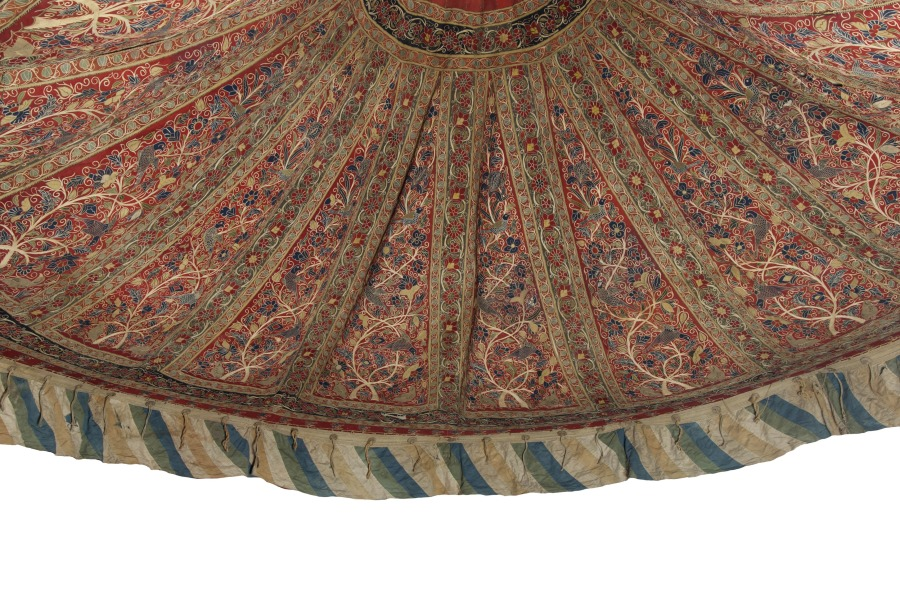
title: Royal Round Tent made for Muhammad Shah (Roof)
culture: Iran, Rasht, Qajar period (1779-1925)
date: 1834–48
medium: Interior: wool: plain weave, inlaid work; silk: embroidery, chain stitch; tape, leather; Exterior: cotton, wool: plain weave; rope, iron ring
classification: Textile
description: Royal tents were potent symbols of authority, wealth, and power throughout the greater Middle East. Rulers owned thousands of tents. They were used for shelter, shade, and innumerable functions in tent compounds that were essential for imperial ceremonies, travel, and military campaigns. Distinguished by size with elaborately decorated interior walls and ceilings, tents could be as large as castles. Opulent tents were also presented as imperial gifts. Tents are only known through documents before 1600. For example, in Baghdad in 809, Caliph Harun al-Rashid owned 4,000 ceremonial tents and 150,000 camping tents that were stored in the imperial Abbasid treasury. An astonishing variety and quantity of tents were housed in the royal Fatimid tent storeroom in Cairo in 1068-69, including "military tents, fortress tents, and castle tents, manufactured of . . . gold-brocaded stuff embroidered with designs of elephants, wild beasts, horses, peacocks, birds." Since 1600, Ottoman Turkish tents with elaborate floral decoration have been preserved in Istanbul in the Topkapi Palace Museum and Military Museum, and in European collections as war booty, primarily from the Ottoman Turks' attempt to conquer Vienna in 1683. These tents are not done in the Rasht technique, but rather are applique. In contrast, royal tents from Iran are extremely rare. This spectacular ceremonial tent is embroidered with the name of its owner, Muhammad Shah, who ruled Iran from 1834 to 1848 during the Qajar dynasty. The radiant jewellike interior features exuberant flora, blossoming vines, and robust birds made with colored wool embellished with silk-thread embroidery.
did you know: Rasht work is named after the city on the Caspian Sea in present-day Iran, which was a major silk trade center with numerous textile workshops.